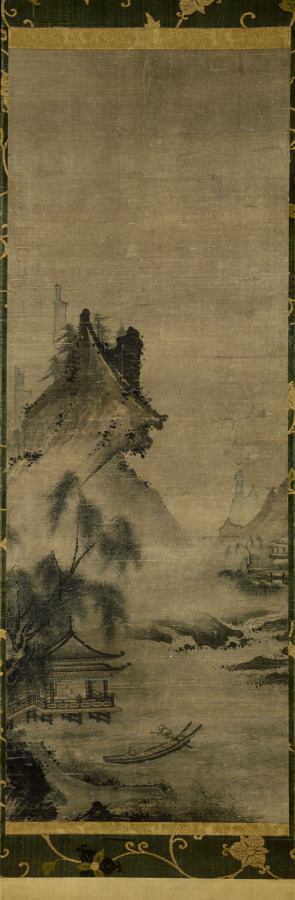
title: Lakeside Retreat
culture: Japan, Muromachi period (1392–1573)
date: late 1400s–early 1500s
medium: hanging scroll, ink and color on silk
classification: Painting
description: This scroll makes clear the rich visual diversity of ink painting outside metropolitan Kyoto. These Kanto region paintings are generous in size, as well as in their visions of imagined foreign scenery. They are similarly composed: foreground expanses of water give way to clouds and bands of mist in middle distance, concealing the bases of the towering peaks, marking the transition in compositional space in both vertical and far distances. These mountain forms dominate the landscape vision as they echo and fill the narrow confines of this traditional hanging scroll format of the Muromachi era. A particular allure of this painting lies precisely in its classical setting highlighted with assertive tonal values in ink washes, dotting strokes, and dotting clusters with the more rustic-but in the Japanese view "natural"-elements of bamboo groves, brushwood fences, grass-roofed huts, and gentle, lowland streams nearby. These are traits linked to 15th-century Korean suibokuga (ink paintings) favored by the many clerics of 15th-century Kyoto and Kamakura. The artist rendered the subject through the filter of 15th-century Korean painting rather than classical Chinese painting. He may even have been a Korean monk-painter resident in one of Kyoto's Zen temples, as many were in the 15th century.